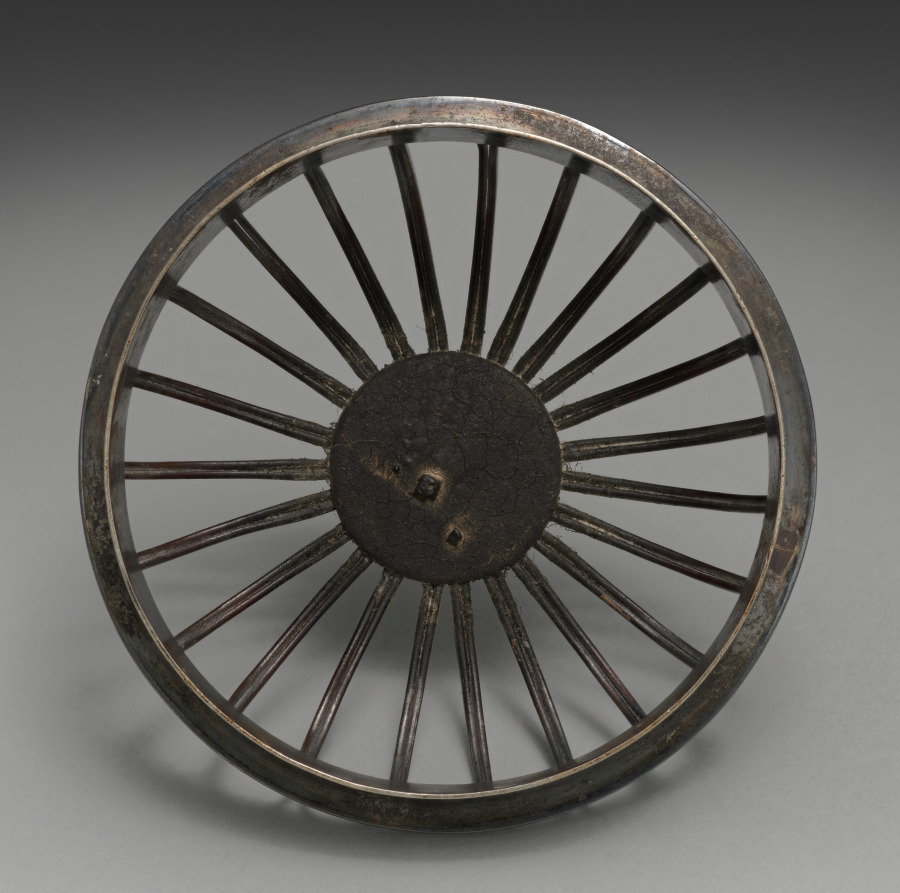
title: Lid for an Incense Burner with Flowers and Dots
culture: Japan, Meiji period (1868–1912)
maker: Seifū Yohei III (Japanese, 1851–1914)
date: 1893–1914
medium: Silver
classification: Ceramic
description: Yohei III made incense burners in a wide variety of designs and styles. The body and glaze of this one are taihakuji, or “great white porcelain,” an important early invention Yohei III devised in 1872 that involved the combination of a distinctive translucent, creamy glaze over an ivory-colored clay body. The silver lid is meant to look like a single flower. The vessel has tapering legs with a combined curvilinear and geometric design; the bands encircling the middle have simple, incised flower motifs alternating with single dots.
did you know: The silver lid was produced outside the studio by metalwork specialists.